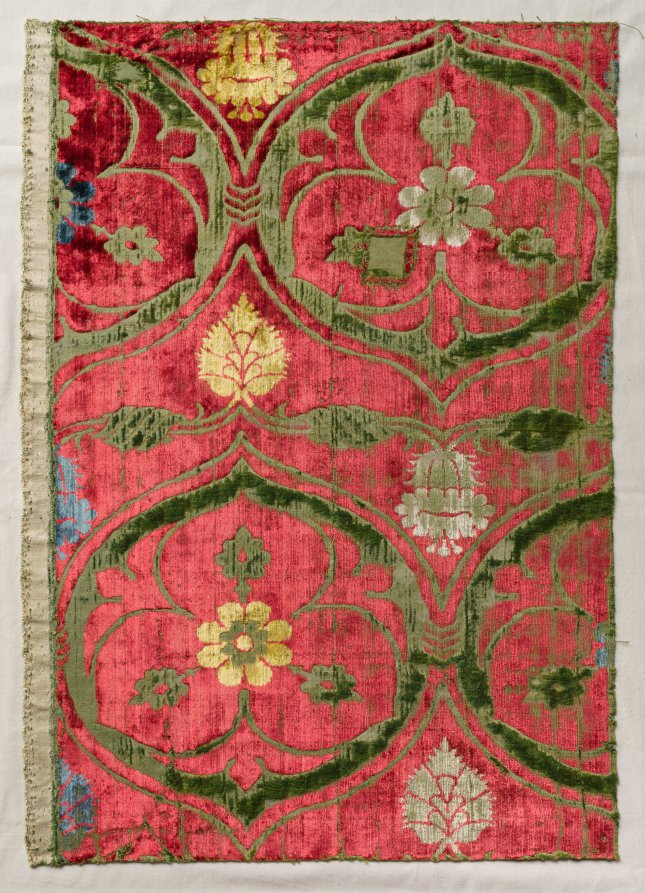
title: Polychrome Velvet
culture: Italy, early 15th century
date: early 1400s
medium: velvet weave (cut and voided): silk thread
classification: Velvet